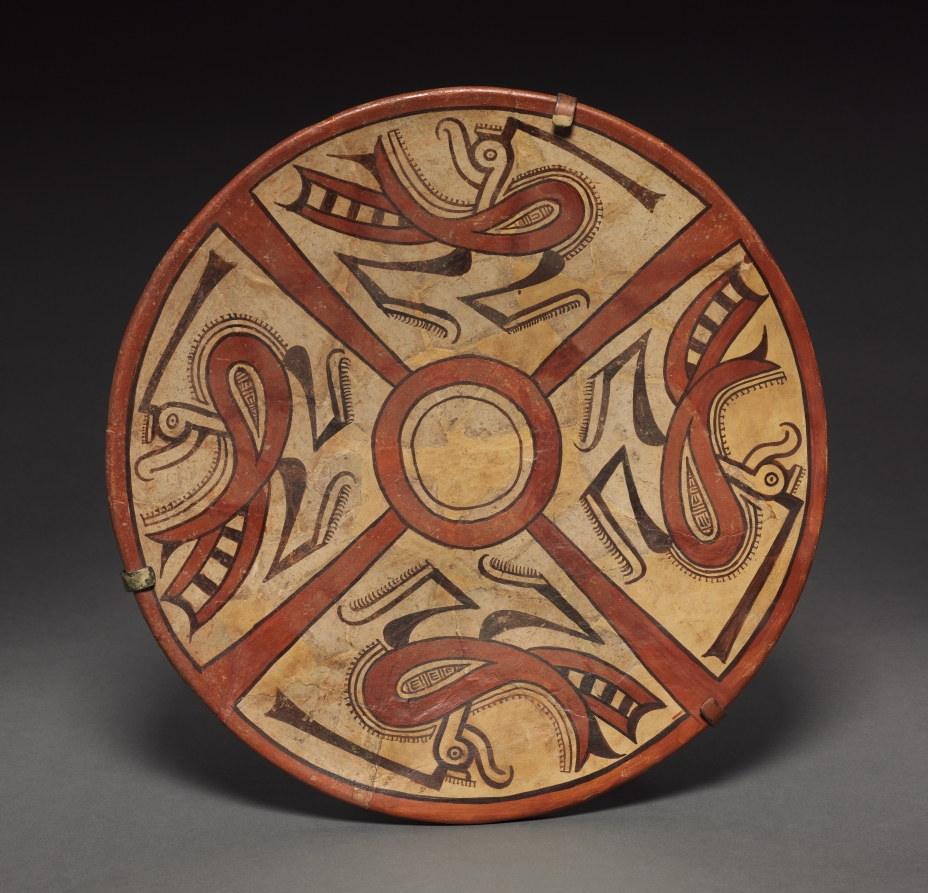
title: Plate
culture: Panama, Cocle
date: 400–1000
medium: pottery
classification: Ceramic